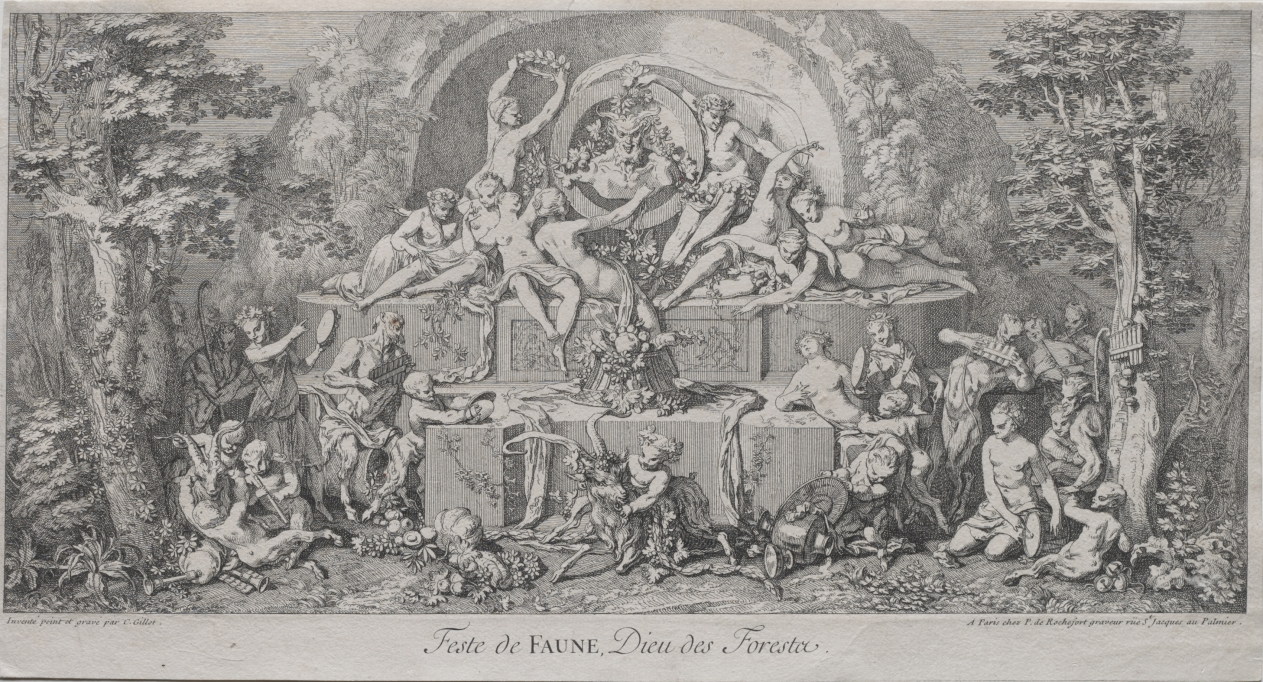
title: The Four Festivals: Festival of Faune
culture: France, 18th century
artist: Claude Gillot (French, 1673–1722)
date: c. 1693–1715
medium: etching and engraving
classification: Print